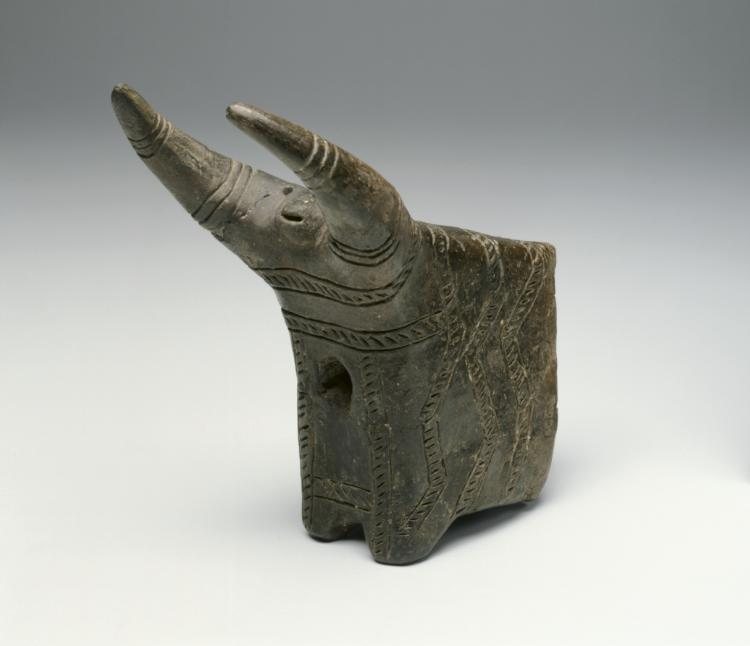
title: Bull Protome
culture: Cyprus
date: 2000–1000 BCE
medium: terracotta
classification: Ceramic